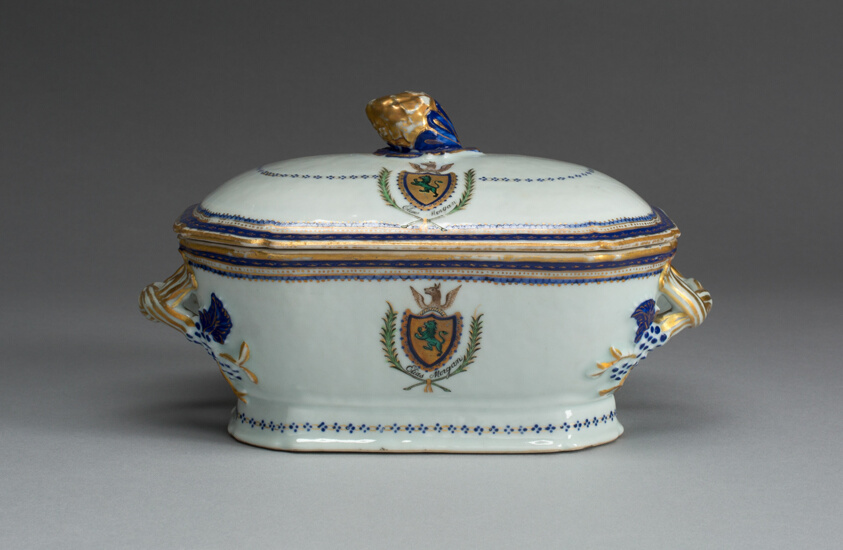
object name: Ceramics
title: Tureen with Cover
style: chinese export, 18th Century, Export porcelain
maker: Artist unknown (Chinese, made for the American market); China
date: c. 1787–90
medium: Hard-paste porcelain, glaze, with enamels in colors, and gilding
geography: China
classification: chinese export porcelain; American market; tureen; art of the americas; porcelain; ceramics; decorative arts; pottery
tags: coat of arms, lions, grapes, geometric motif, dining, pine cones, purple (color), vines